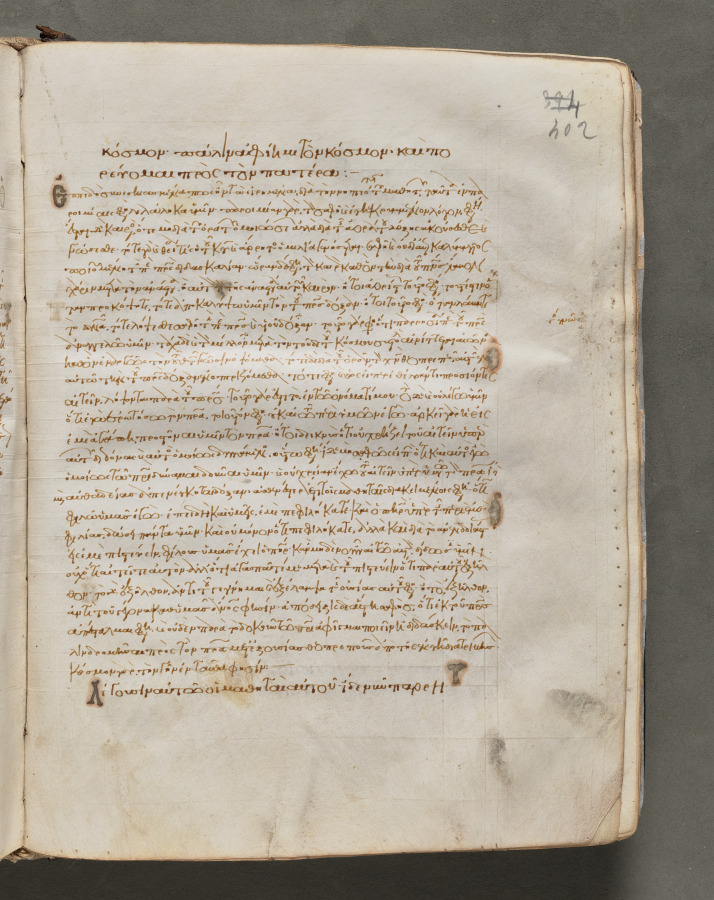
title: Text, folio 402 (recto), from a Gospel Book with Commentaries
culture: Byzantium, Constantinople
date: c. 1000–1100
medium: ink, tempera, and gold on vellum; leather binding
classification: Bound Volume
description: Each of the four gospels in this book opens on a page with brilliantly illuminated borders depicting the author of the text as well as birds—principally peacocks, symbols of the immortality of the soul—and fountains, representing the fountain of life and the salvation of the soul. This volume consists of 428 leaves with texts in Greek. Its level of sophistication suggests that it was probably written and decorated in a monastery in Constantinople.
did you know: Gospel books were carried in procession through Byzantine churches.